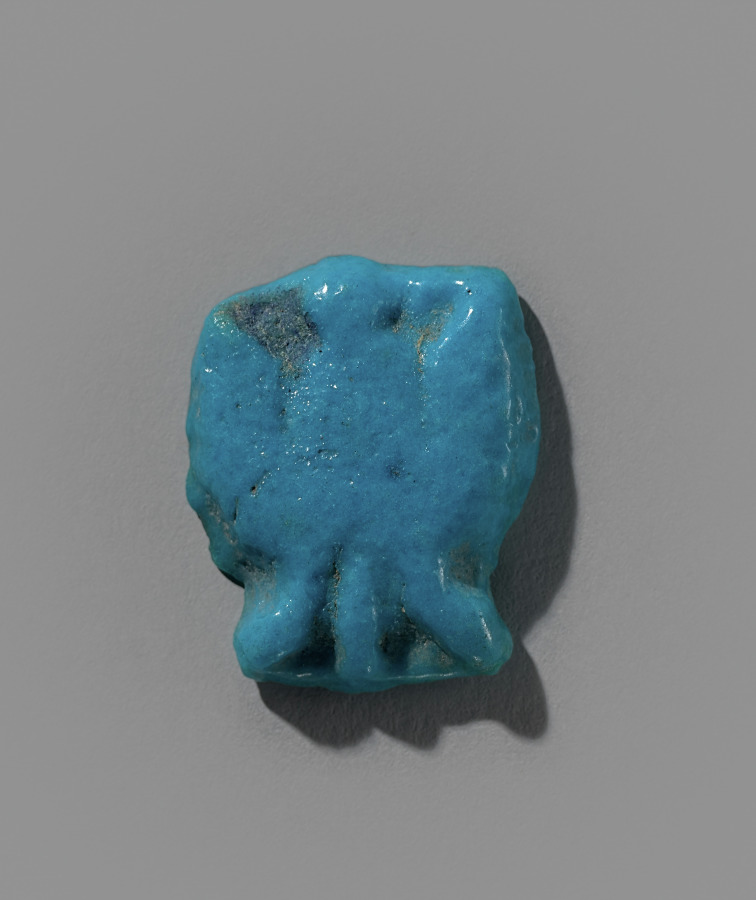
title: Food Model Amulet: Brace of Duck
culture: Egypt, New Kingdom (1540–1069 BCE), Dynasties 19–20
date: 1295–1069 BCE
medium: turquoise faience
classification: Amulets